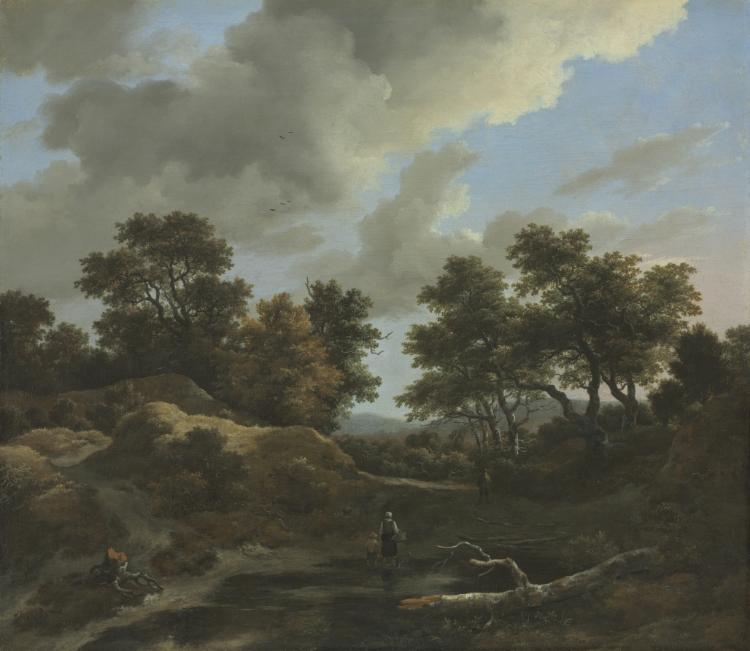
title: Wooded and Hilly Landscape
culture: Netherlands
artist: Jacob van Ruisdael (Dutch, 1628/29–1682)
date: 1660s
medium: oil on canvas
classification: Painting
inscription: Signed lower left: "JvRuisdael [JvR in monogram]"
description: Jacob van Ruisdael, one of the most eminent Dutch landscape painters, is revered for his brooding woodland compositions. With much of this painting's composition dedicated to nature alone, an underlying sense of sublimity is heightened by Ruisdael through the inclusion of several diminutive figures. A mother and child trudge through a weathered path in the foreground, their pet dog following closely at their side, while a lone traveler approaches from the foliage ahead of them. This work is an excellent representation of the artist's later period, speaking to both his preoccupation with meticulous detail and the transitory relationship between humans and nature.